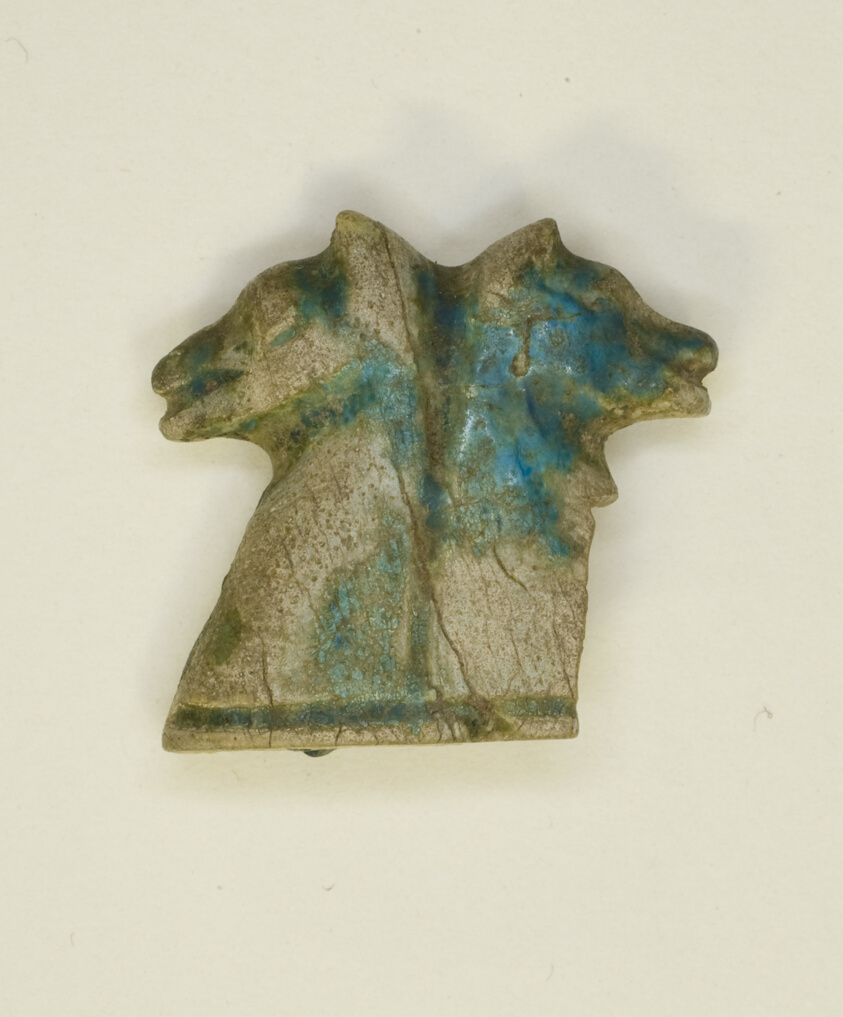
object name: Costume and Accessories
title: Amulet of Two Back to Back Canine Heads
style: egyptian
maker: Egyptian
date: First Intermediate Period? (about 2160 BCE)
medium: Glazed steatite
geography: Egypt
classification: amulet; ceramics; jewelry; ancient art; costume